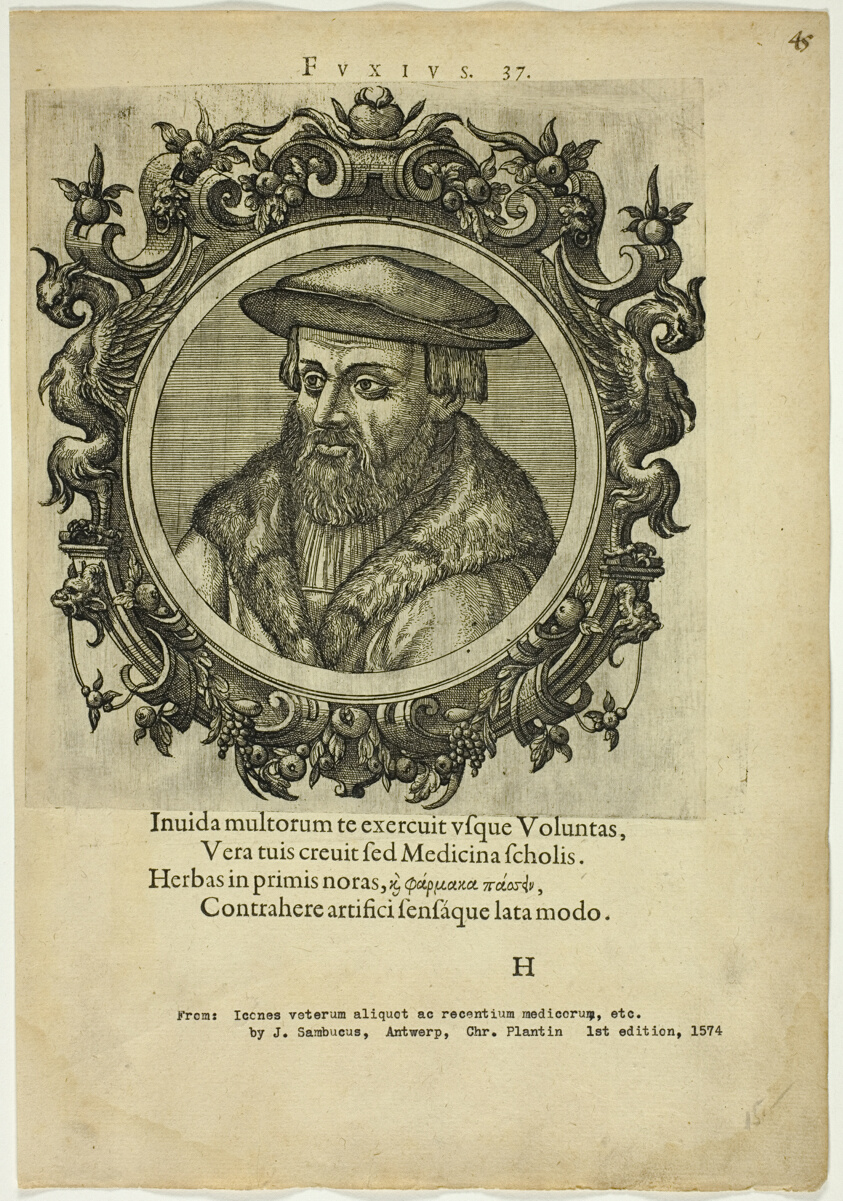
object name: Print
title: Portrait of Fuxius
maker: Unknown Artist (Flemish); written by Johannes Sambucus (Flemish, 1531-1584)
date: published 1574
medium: Etching, with engraving, on cream laid paper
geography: Flanders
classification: etching; print; prints and drawing